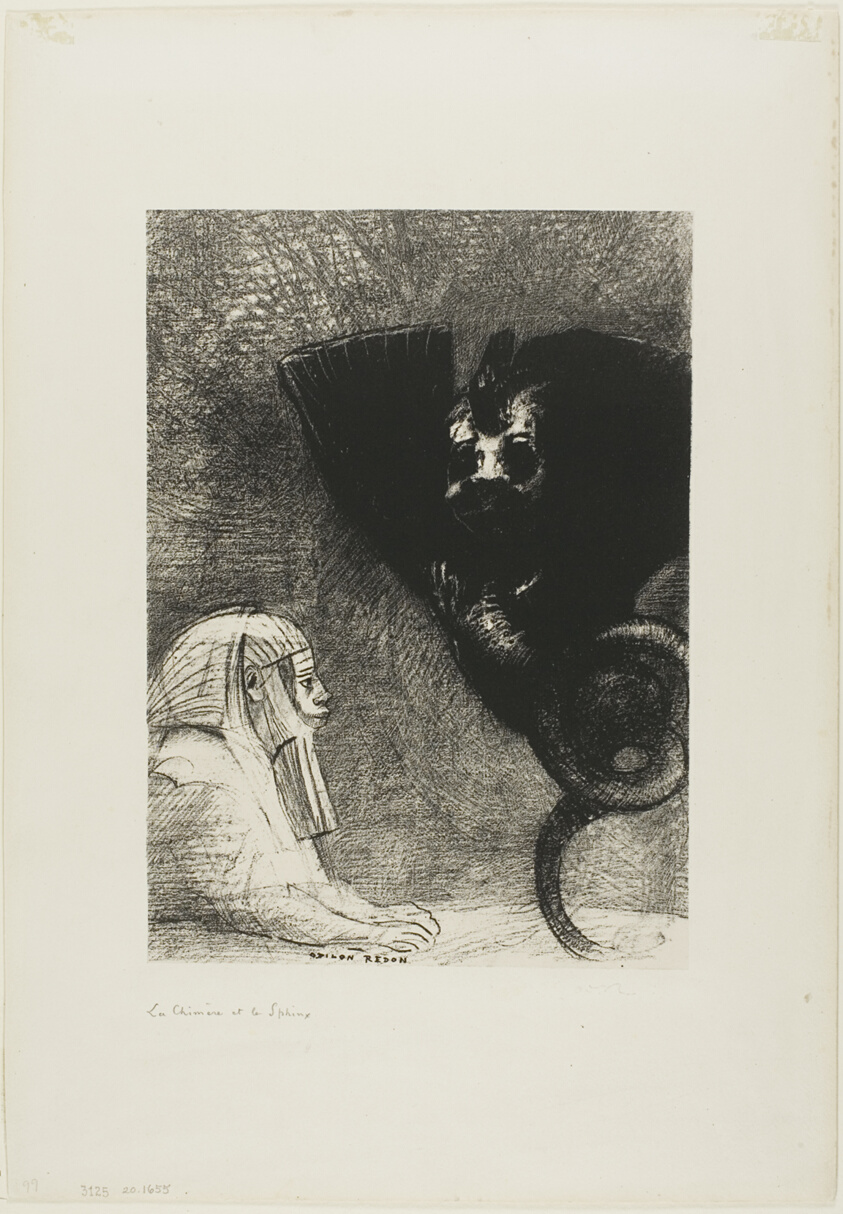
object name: Print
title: The Sphinx: "...my gaze that nothing can deflect, passing through objects, remains fixed on an inaccessible horizon." The Chimera: "As for me, I am light and joyful," plate 5 from To Gustave Flaubert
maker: Odilon Redon (French, 1840-1916)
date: 1889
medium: Lithograph in black on ivory China paper laid down on ivory wove paper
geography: France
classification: lithograph; print; prints and drawing; paper